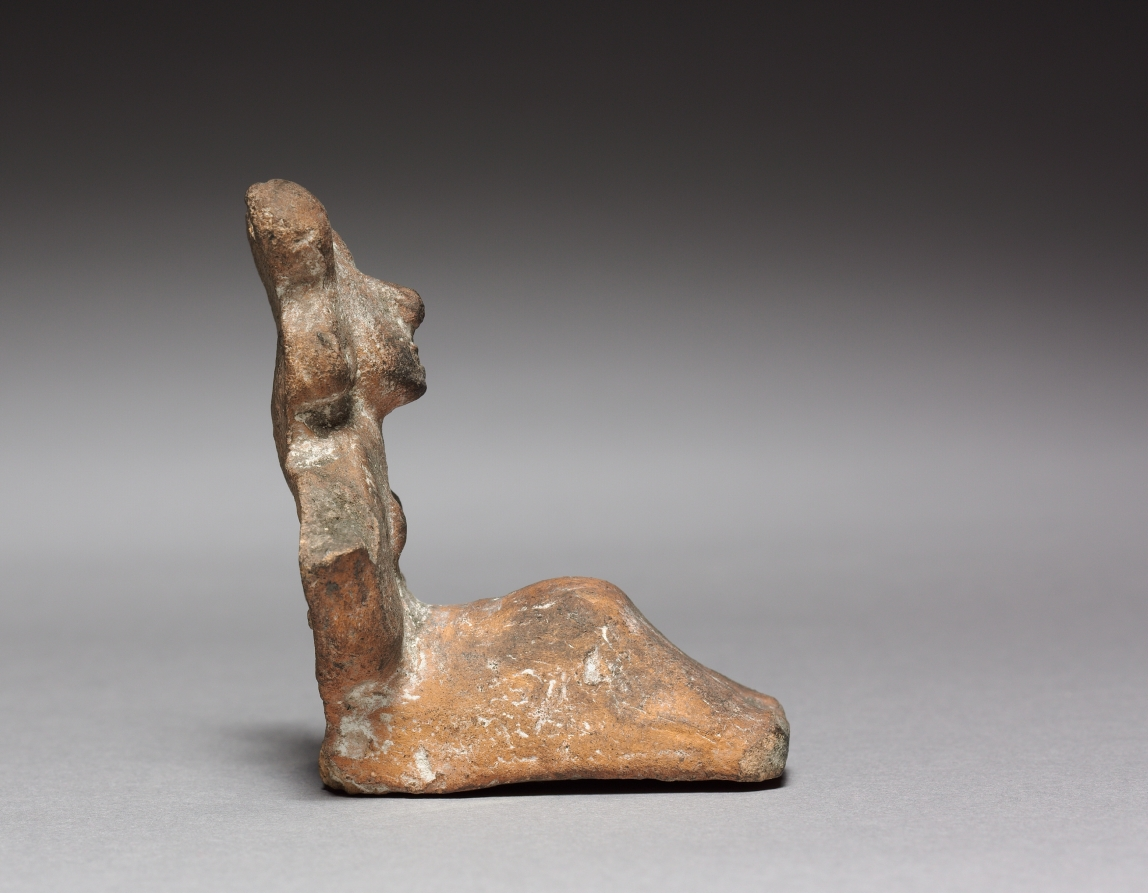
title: Figurine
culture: Mexico, Aztec, 14th century-16th century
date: 1325–1521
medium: terracotta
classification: Ceramic